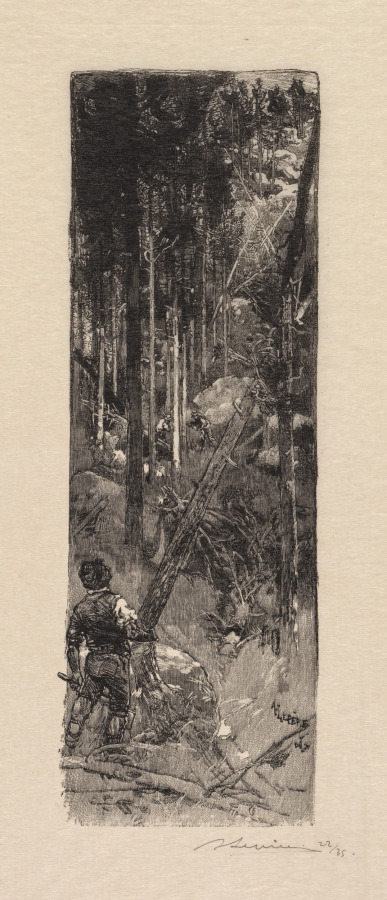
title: Fontainebleau Forest: Cutting of Pines (La Forêt de Fontainebleau: Abatage des pins)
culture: France, 19th century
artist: Auguste Louis Lepère (French, 1849–1918)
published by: A. Desmoulins, Published in Revue Illustrée, 1887–90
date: 1890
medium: wood engraving from bound volume of 34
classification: Bound Volume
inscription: Below image, lower right, in black ink: ALepère 22/35; in block, lower right: ALEPÈRE / De. Sc; on window mat, lower right, in graphite: Abatage des pins